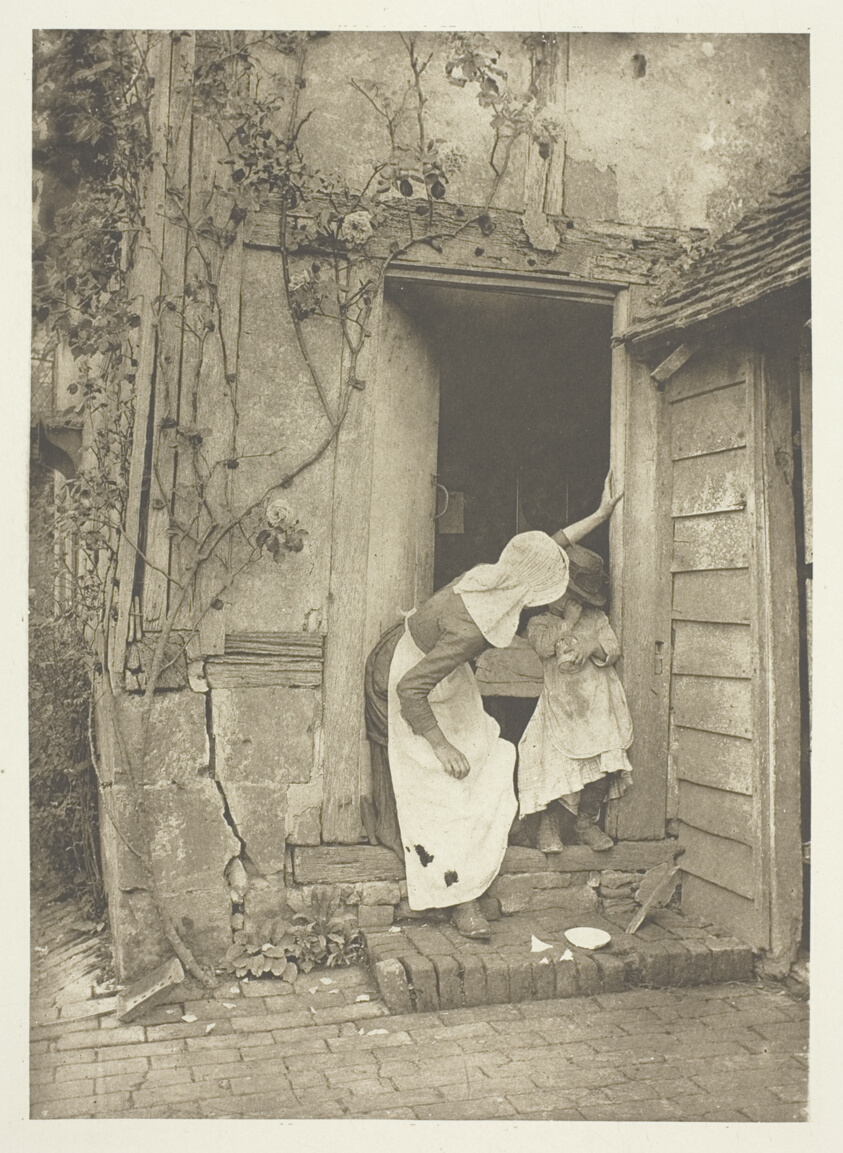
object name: Photograph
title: The Broken Saucer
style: 19th century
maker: J. B. B. Wellington (English, 1858–1939)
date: c. 1880/90, printed April 1890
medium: Photogravure, from "Sun Artists, No. 3" (1890)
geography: England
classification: photogravure; photomechanical process; photography; photograph